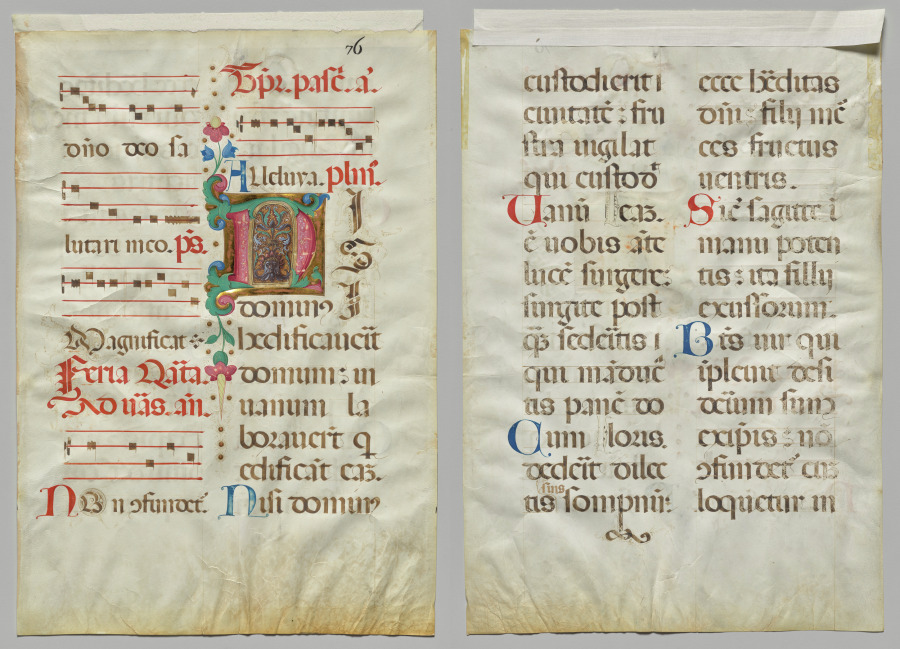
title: Leaf from an Antiphonary: Floral Initial (recto); Text (verso)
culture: Italy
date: c. 1475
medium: Ink, tempera, and gold on vellum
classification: Manuscript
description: The leaf comes from an Antiphonale, a liturgical book that contains the melodies and texts of all the chants of the Liturgy of the Hours, the antiphons. These include the psalms, responsories and hymns, which are arranged in the book in the order of the church year. The antiphons served clergymen and monks or nuns for their service in the choir stalls of the church.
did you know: Churches had mostly two copies of this book because the clergymen were sitting in the coir stall on both sides of the high altar and therefore needed a copy for each side.